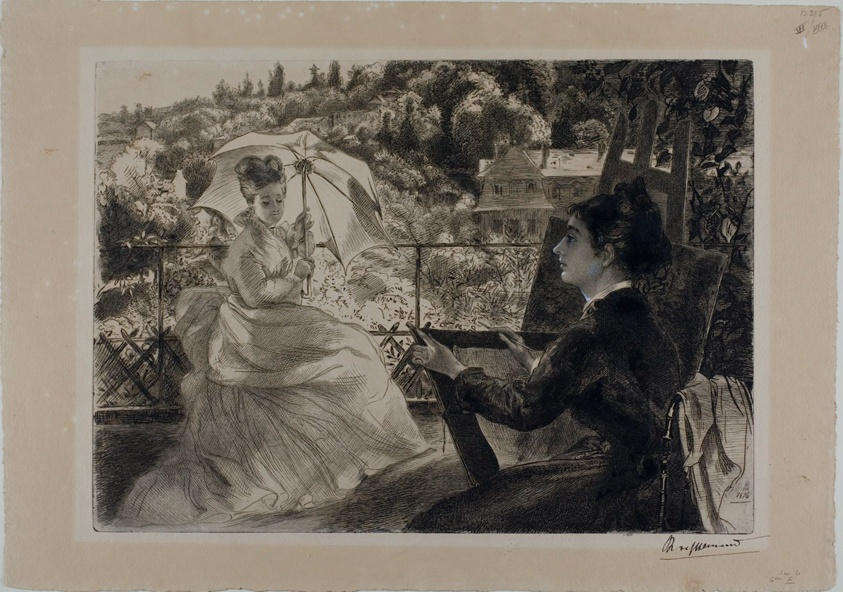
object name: Print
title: The Terrace of the Villa Brancas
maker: Felix Bracquemond; French, 1833–1914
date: 1876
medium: Etching and brush and black ink, heightened with traces of white gouache on cream laid paper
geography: France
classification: etching; print; prints and drawing